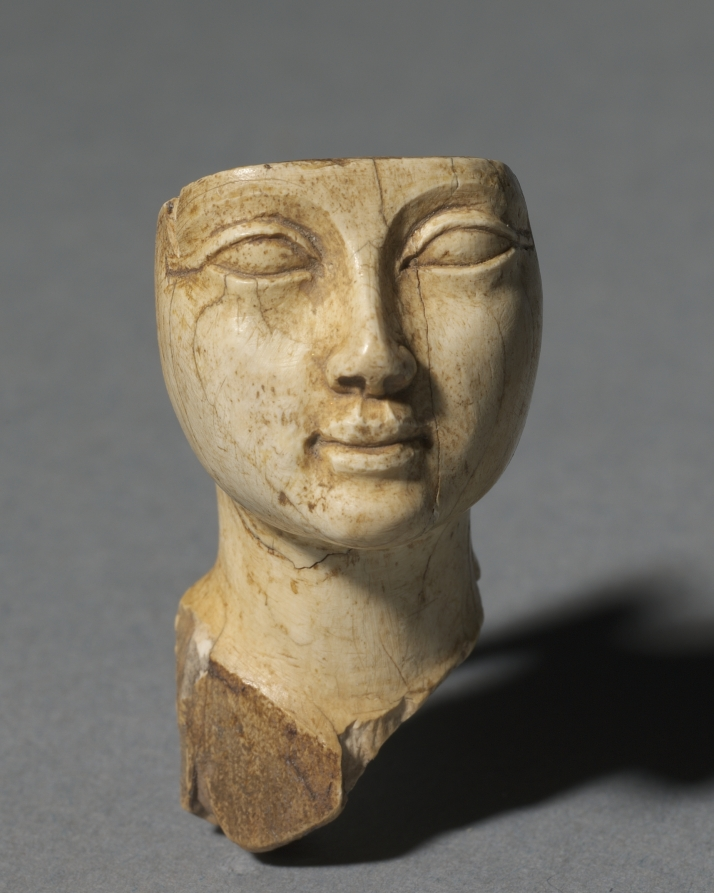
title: Face from a Cosmetic Spoon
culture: Egypt, New Kingdom (1540–1069 BCE), Dynasty 18, reign of Amenhotep III (1390–1352 BCE)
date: 1391–1353 BCE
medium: ivory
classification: Cosmetic Objects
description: Both ancient Egyptian men and women loved cosmetics. Unguents, oils, and perfumes made from aromatic plant resins and gums were obtained at great cost from distant lands. The objects identified with cosmetics were given lavish treatment. This delicately carved human face would have decorated an elaborate ivory cosmetic spoon.